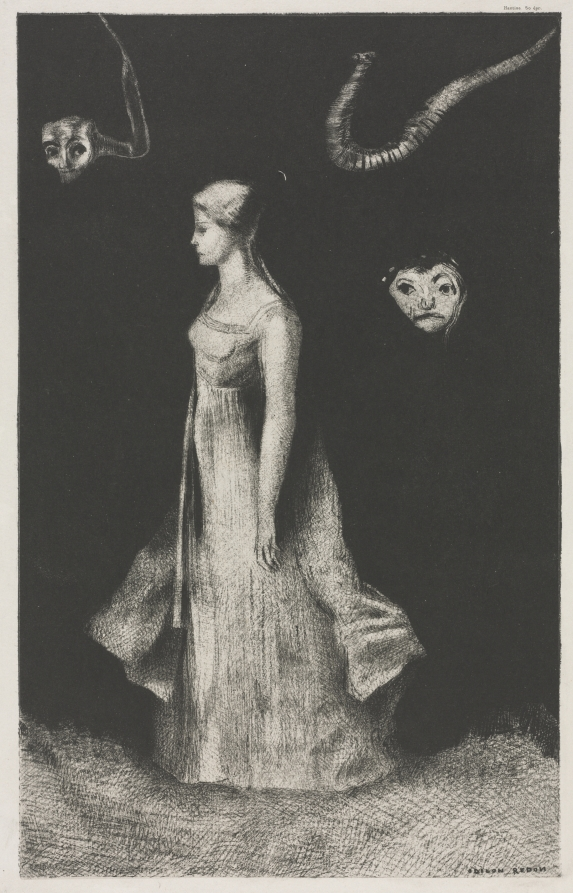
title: Obsession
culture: France, late 19th Century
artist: Odilon Redon (French, 1840–1916)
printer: Printer: Monrocq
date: 1894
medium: lithograph on China paper laid down on wove paper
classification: Print